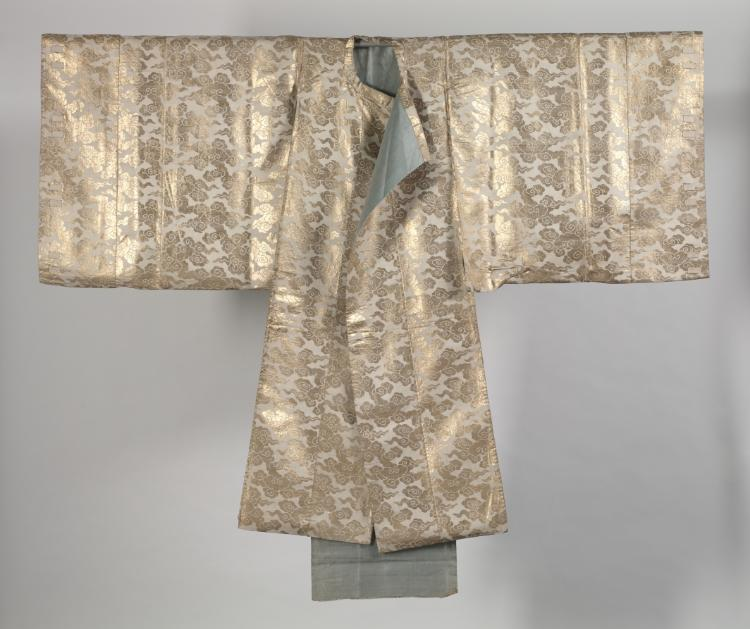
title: Noh Costume (Kariginu)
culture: Japan, Edo period (1615–1868)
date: 1800–1850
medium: silk, compound weave; metal thread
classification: Garment